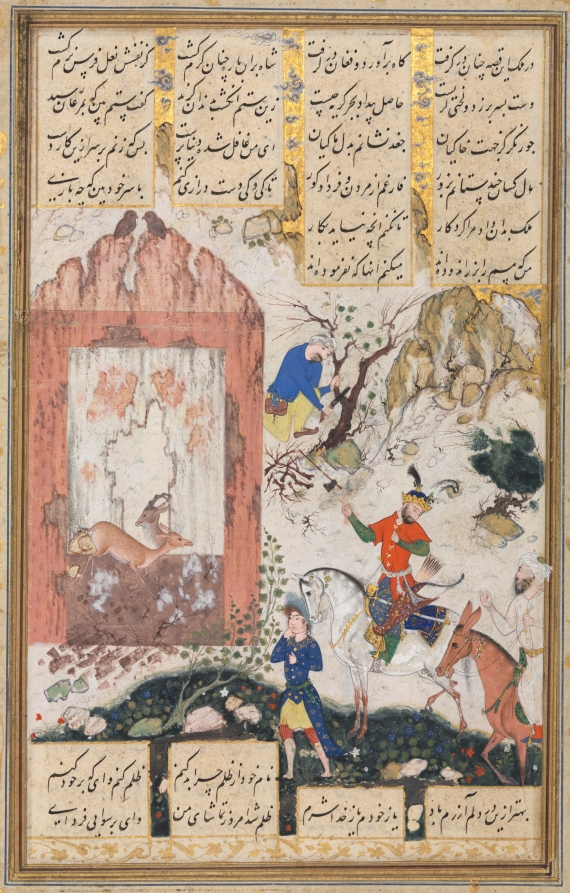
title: Nushirwan Listens to the Owls (recto): Illustration and Text, Persian Verses, from a Manuscript of the Khamsa of Nizami, Makhzan al-Asrar [Treasure of Secrets]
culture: Iran, Qazvin, Safavid period (1501-1722)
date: 1555–65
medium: opaque watercolor, ink, and gold on paper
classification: Manuscript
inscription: script: Nasta'liq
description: This scene is from the Makhzan al-Ashrar, the first of the Quintet. Although more historically oriented than the following poems, it served more as a vehicle for moralizing tales than for historical events. In this scene Nushirwan asks the sage Buzurgmihr to explain what the owls perched on a ruined building are saying. He explains that one owl is offering the other as many ruined cities as he likes in exchange for his daughter's hand. He thus reproves Nushirwan for his love of conquest and war and the consequent destruction of many cities.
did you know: King Nushirwan is on a white horse, while his minister Buzurjmihr is riding a mule.